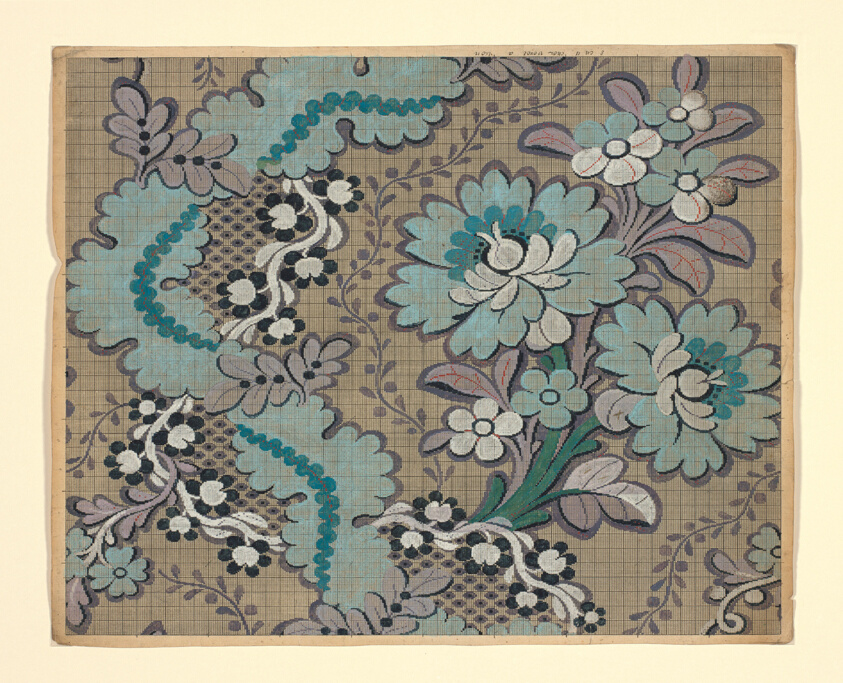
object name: Drawing and Watercolor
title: Mise-en-carte (Point-paper)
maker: France, Lyon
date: 1760/90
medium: Ink and gouache on hand drawn graph paper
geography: France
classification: textile; accessory - paper design